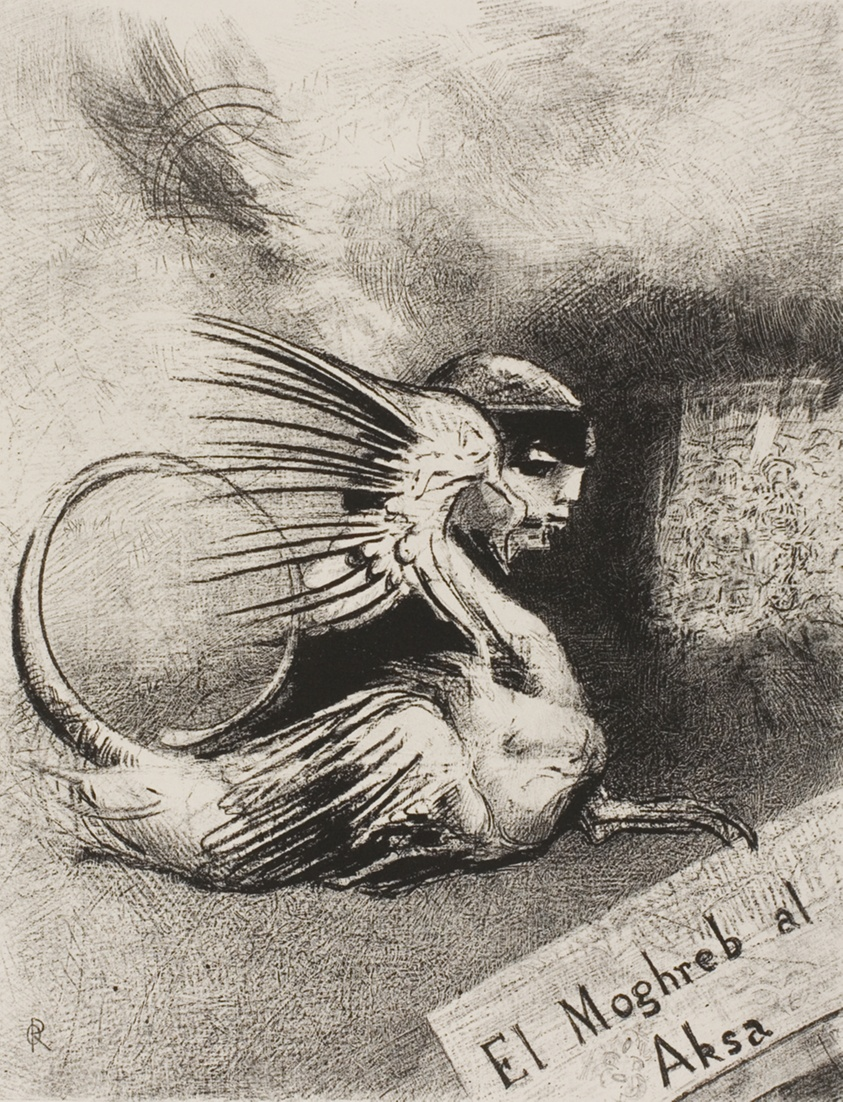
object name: Print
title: Frontispiece for El Moghreb al Aksa by Edmond Picard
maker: Odilon Redon (French, 1840-1916)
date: 1889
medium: Lithograph in black on ivory China paper laid down on ivory wove paper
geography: France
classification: lithograph; print; prints and drawing; paper